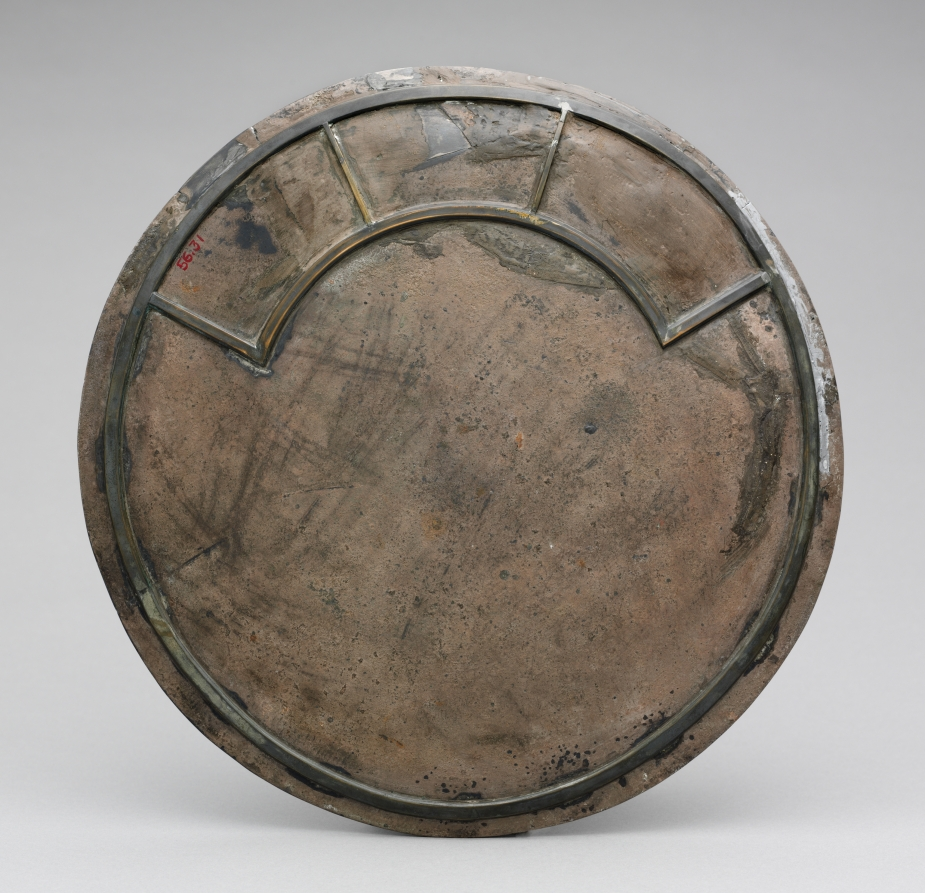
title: Mirror with a Handle in the Form of a Herakles Knot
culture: Byzantium, Syria(?), Byzantine period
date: c. 280–400 CE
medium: silver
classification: Metalwork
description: This type of mirror was introduced throughout the Roman Empire by the 2nd century and remained popular into the 3rd and 4th centuries. Similar examples have been found in Germany and Britain. The handle is made of two thick pieces of silver wire, intertwined to form a Herakles knot--a knot so complex that only someone as strong as Herakles could break it. In antiquity, knots of various kinds were believed to provide protection from harm.